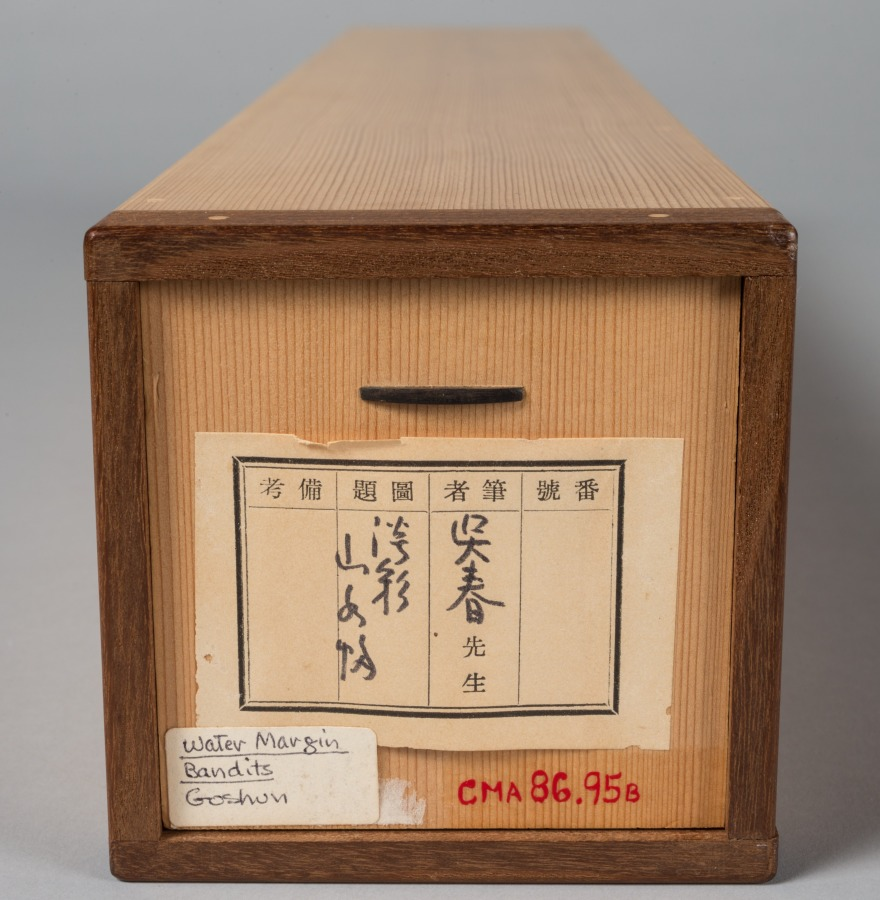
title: Happy Forest, from Water Margin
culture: Japan, Edo period (1615–1868)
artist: Matsumura Goshun (Japanese, 1752–1811)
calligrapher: and Amenomori Shōteki (Japanese, 1731–1786)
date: late 1700s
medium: hanging scroll; ink and color on paper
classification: Painting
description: The Chinese literary classic Water Margin is set in the 1120s and tells the story of 108 outlaws who first rebel against the government and then join forces with it. This painting depicts an episode in which hero Wu Song reclaims the tavern Happy Forest for its rightful owner, the prison warden’s son, Shi En. To prepare for the fight, Wu Song drinks a lot of wine. The painting was inscribed with a quote in which an ally describes Wu Song’s fighting style. It reads as follows: Where his twin fists rise, clouds and thunder roar, When his flying kick comes, wind and rain tremble.